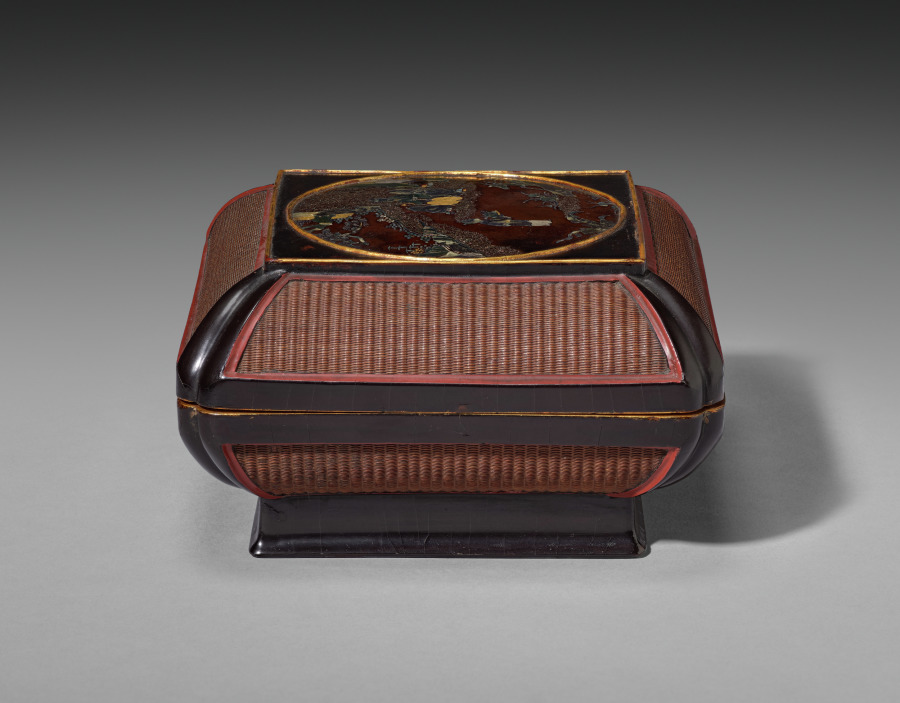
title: Wickerwork Box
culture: China, Ming dynasty (1368-1644), Wanli reign (1572-1620)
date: 1609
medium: lacquered wickerwork (of woven bamboo) framed in wood with circular scene inlaid in mother-of-pearl and gold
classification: Lacquer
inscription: Inscription at bottom in red on black lacquer reads: "commissioned by Yü-Yün-ch'i".